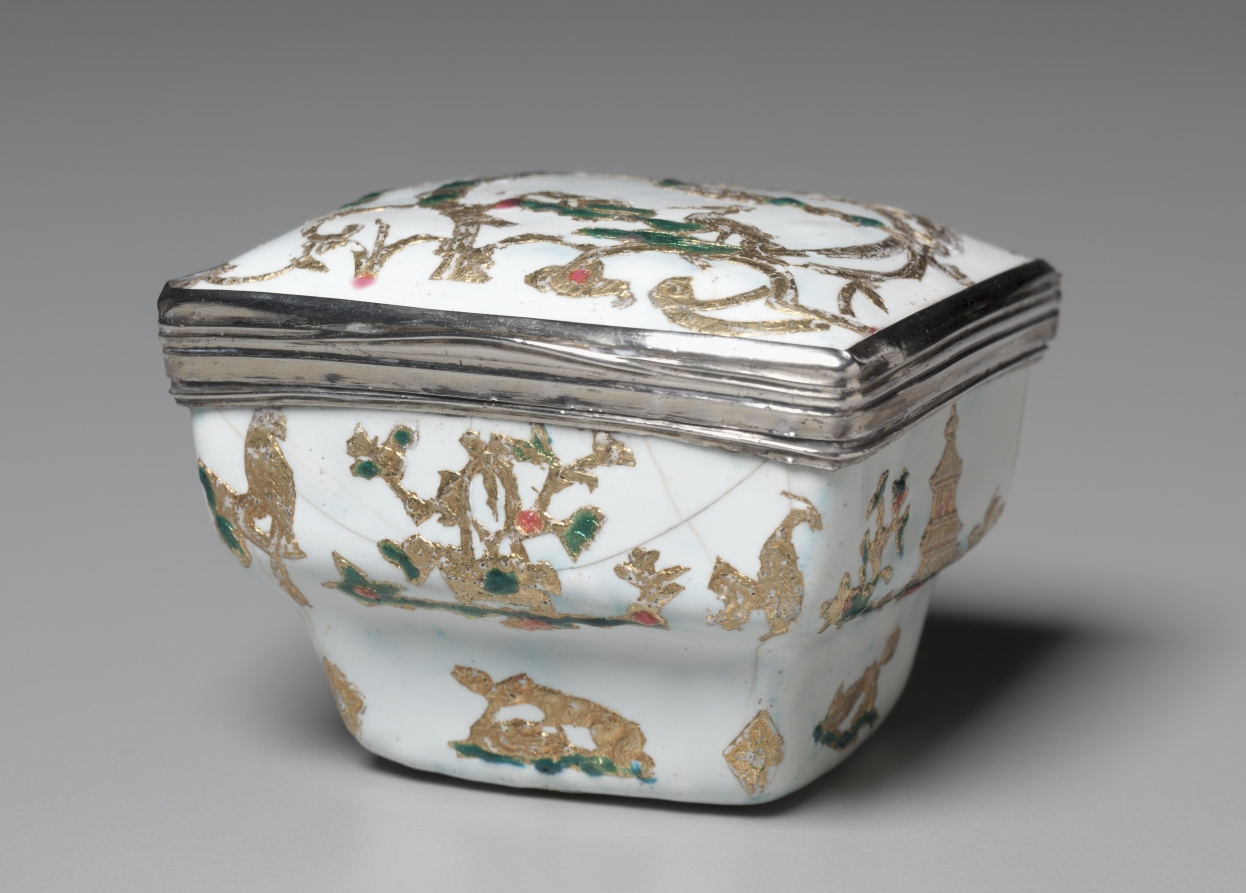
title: Box (Boîte)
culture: possibly France, mid-18th century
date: 1730–40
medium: enamel and gold leaf on copper mounted in silver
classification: Miscellaneous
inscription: [Traces of marks on mounts, too rubbed to be legible. One has previously been identified as possibly a French discharge mark of middle-18th century (Beuque 669 or 687). Maybe the discharge mark for small work of Hubert Louvet, Paris, 1732-38, left side of rim.]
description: Chinoiserie in 18th-century France incorporated imitations of East Asian motifs, designs, and ornaments into European art. These imitations were often distorted by the European imagination and were not accurate representations of the cultures from which they drew inspiration. Motifs typical of chinoiserie can be seen in this box’s floral patterns and repeated representations of pagodas, dragons, and peacocks.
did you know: The depictions of various animals and plants on this box have been covered in a very thin layer of gold called gold leaf.